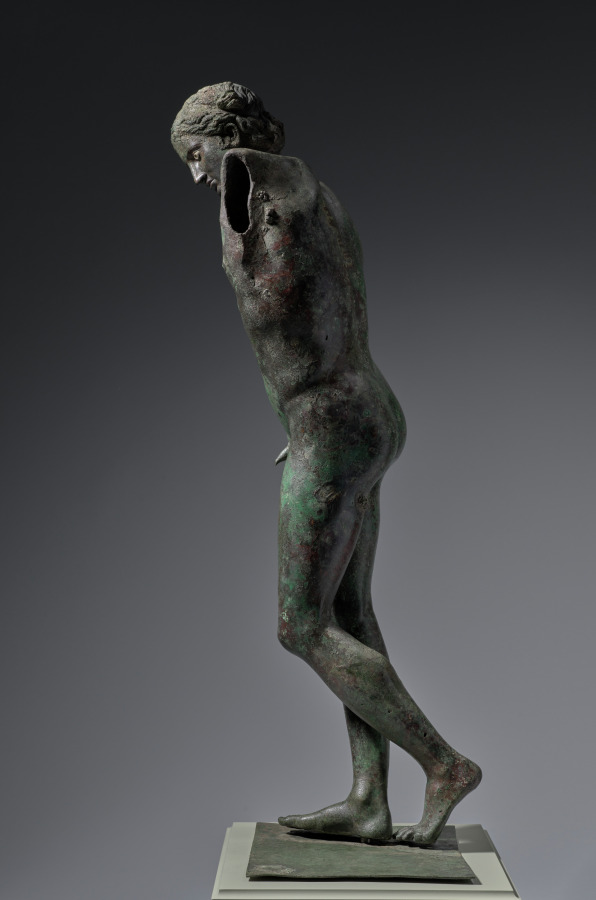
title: The Cleveland Apollo: Apollo Sauroktonos (Lizard-Slayer) or Apollo the Python-Slayer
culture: Greece, Athens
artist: attributed to Praxiteles (Greek, Athenian, c. 400–330 BCE)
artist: or Follower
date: c. 350–200 BCE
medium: bronze, copper, and stone inlay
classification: Sculpture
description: The Cleveland Apollo has been called both Lizard-Slayer (Sauroktonos) and Python-Slayer. The first name comes from the Roman author Pliny the Elder (23–79 CE), who noted in describing bronze works made by the Athenian sculptor Praxiteles (active around 370–330 BCE), “the youthful Apollo [is] known as the Sauroktonos because he is aiming an arrow at a lizard [Greek sauros] which is stealing toward him.” Scholars have long connected this description with artworks showing the young Greek god Apollo in a distinctive pose and hairstyle, standing on his right leg and leaning to his left. In more completely preserved versions, Apollo reaches toward a tree with his left arm and seems to take aim at a lizard. The Cleveland Apollo shows the adolescent god similarly posed and coiffed, making it an important addition to the Apollo Sauroktonos group—the only surviving large-scale bronze sculpture of the type. The young Greek god Apollo, identifiable by his distinctive hairstyle and pose, stands on his right leg and leans to his left, probably toward a now-lost tree. Although now separated, the left forearm and hand survive, together with an unusual lizard-like creature, perhaps drawn from the world of myth. A flat bronze base also remains, though it may be a later adaptation. A tree or other support has been lost, probably smaller than in the marble versions. Given its material and very high artistic quality—note the lifelike hair, fingernails, and inlaid copper lips and nipples—more than one scholar has suggested that the Cleveland Apollo could be the very sculpture seen by Pliny. Some have called the sculpture “Python-Slayer,” seeing the oddly shaped serpentine creature with asymmetrical legs as the mythical Python killed by Apollo in establishing his sanctuary at Delphi. But technical details may explain some of the asymmetry, and no other specific evidence connects it to Delphi. Most scholars would retain the name Sauroktonos (Lizard-Slayer) for the Cleveland Apollo, even as some debate whether it was made by Praxiteles himself or a later follower.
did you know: The Cleveland Apollo is the only surviving large-scale bronze sculpture of its type, Apollo Sauroktonos (the Lizard-Slayer).